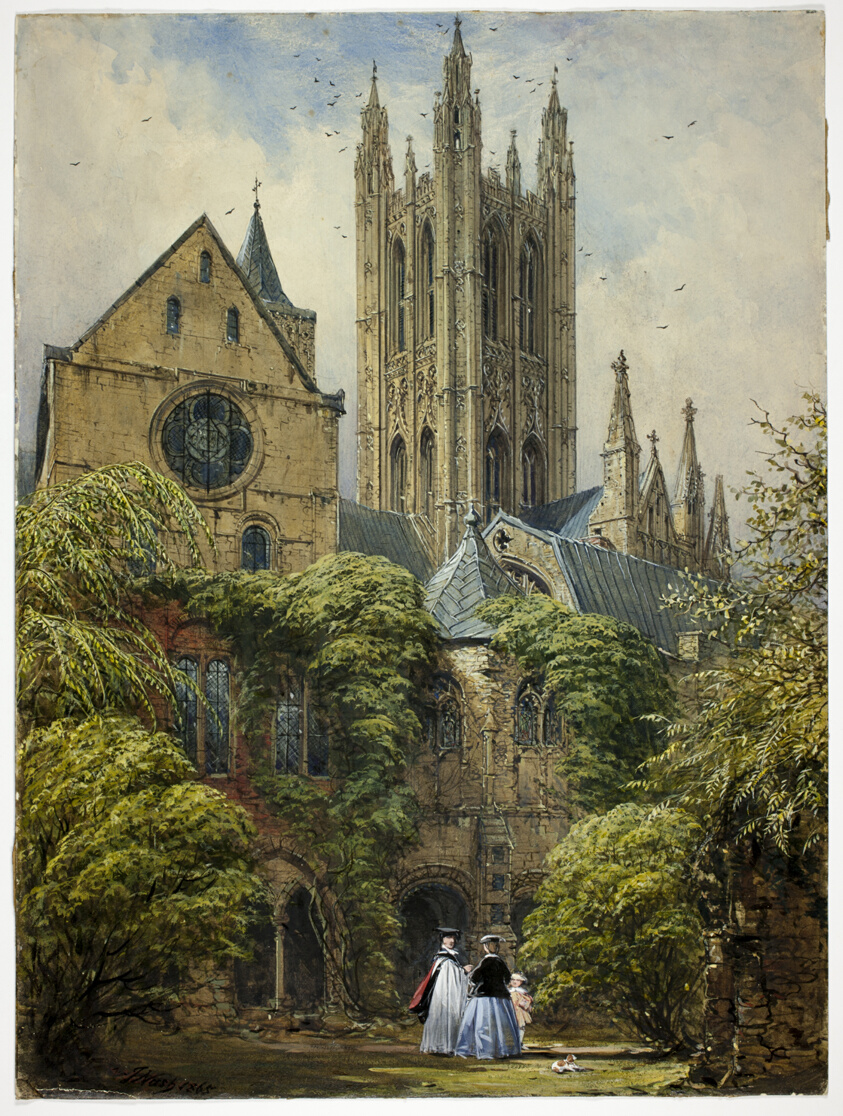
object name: Drawing and Watercolor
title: Professor, Woman, Child and Dog in Cathedral Close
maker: Joseph Nash (British, 1808-1878)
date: 1860/65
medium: Watercolor and gouache on ivory wove card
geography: England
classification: gouache; drawings (visual works); prints and drawing